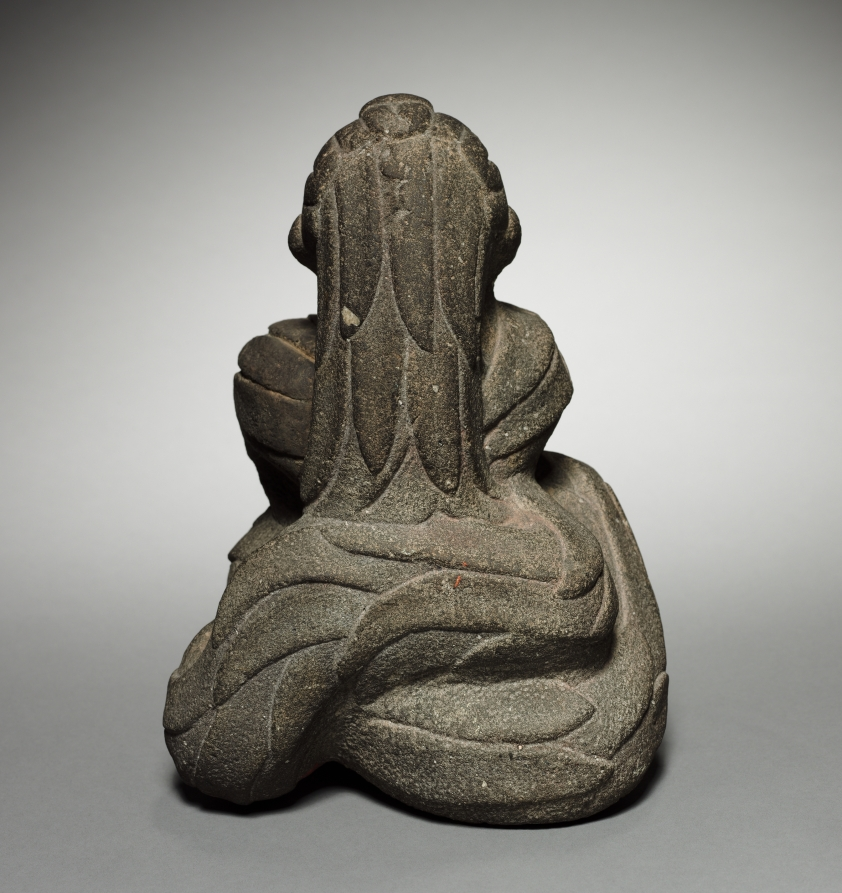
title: Feathered Serpent (Quetzalcoatl)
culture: Central Mexico, Aztec or modern, Post-Classic Period or modern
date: 1325–1521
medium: stone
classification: Stone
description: The museum bought this sculpture in 1941, when study of ancient American arts was in its infancy. It has many odd features, a few perhaps revealing an attempt to make the subject—the Aztec deity Quetzalcoatl (Feathered Serpent)—palatable to modern viewers. But it cannot absolutely be declared fake because some real Aztec sculptures are unusual. Analysis of the surface so far provides no help. Especially odd is the arrangement of the coils into bulges that suggest the pectorals, knees, and buttocks of a human body, as though the sculpture represents a human in a serpent costume. Real Aztec sculpture usually portrays the serpent's dangerous body more realistically. Also, the mouth mask—the insignia of a wind deity related to Quetzalcoatl and, thus, perhaps appropriate—is much larger in genuine sculptures. This suggests that, because the mask and its authentic proportion are strange to our eyes, a forger scaled it down. Other uncommon features include the incomplete carving of the ears, the fact that the human head does not emerge from a serpent's mouth, and more.